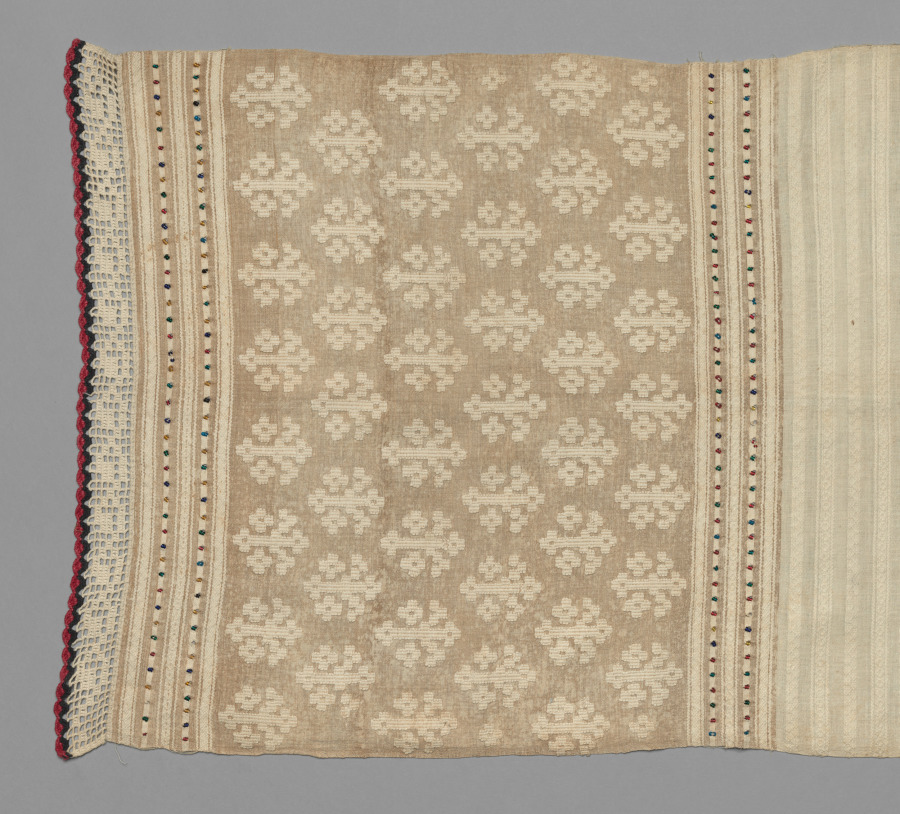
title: Towel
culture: Spain(?)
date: 1900–1920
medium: Plain weave and weft brocaded linen: crochet and embroidery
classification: Textile